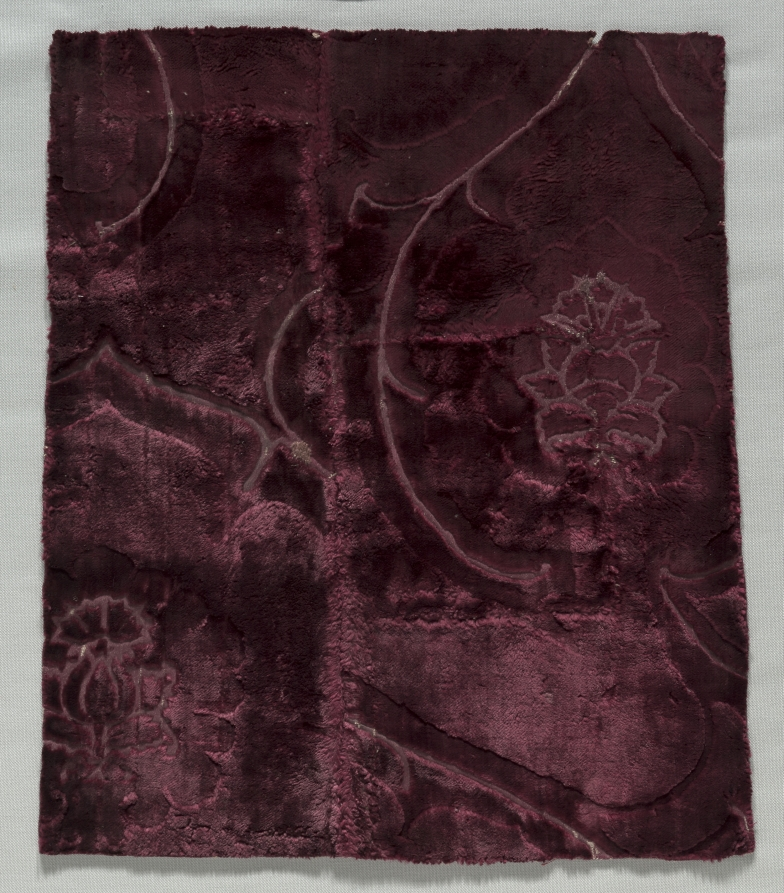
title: Two Velvet Fragments Sewn Together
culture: Italy, 15th century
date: 1400s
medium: velvet (cut and voided)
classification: Velvet